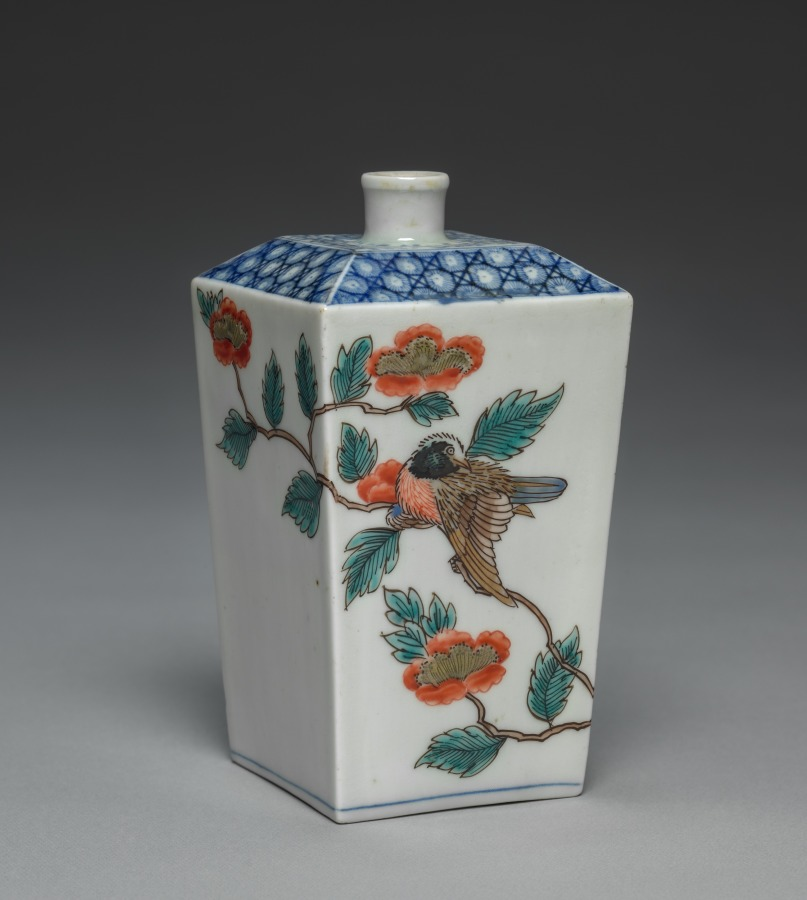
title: Bottle with Bird and Butterfly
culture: Japan, Edo period (1615–1868)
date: late 1600s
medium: porcelain with underglaze blue and overglaze color enamel and gold (Hizen ware, Ko-Imari type)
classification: Ceramic